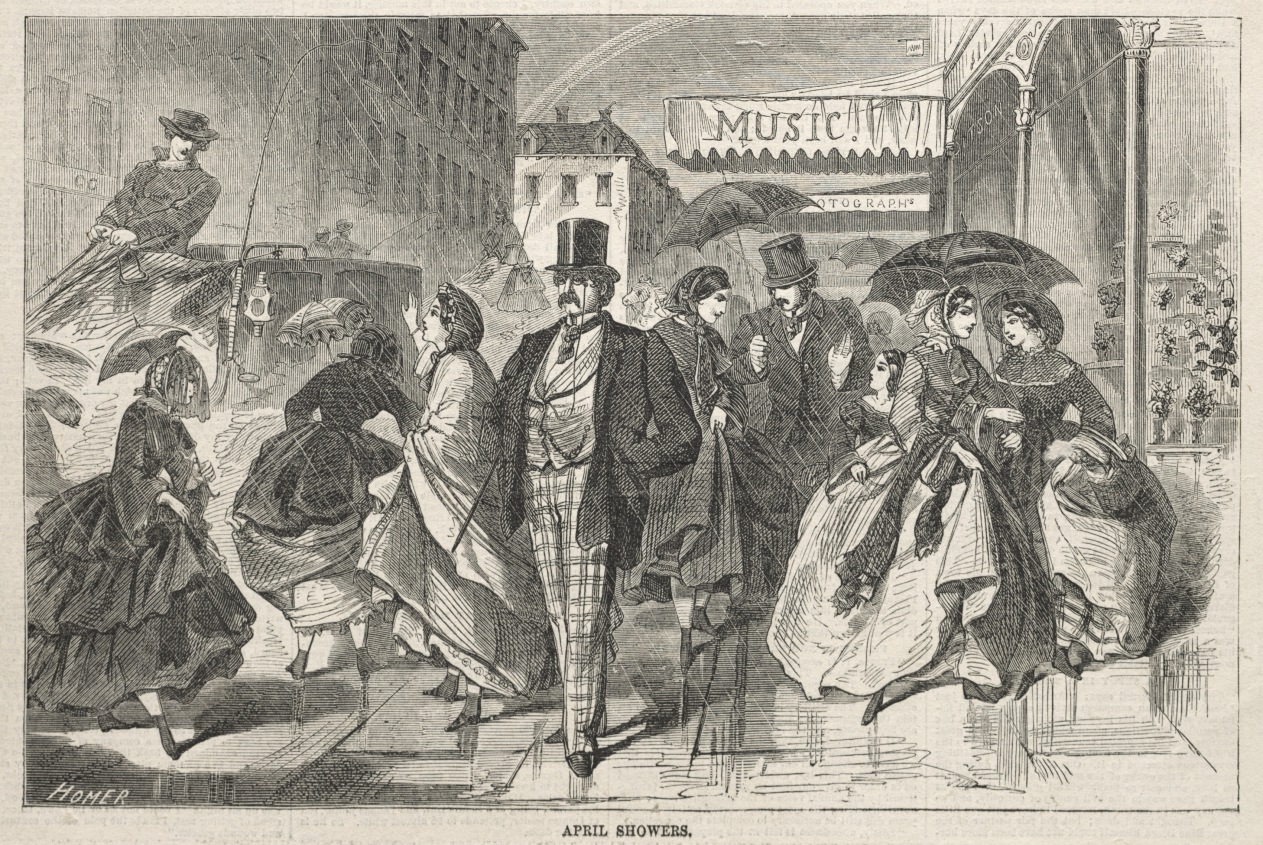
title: April Showers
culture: America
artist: Winslow Homer (American, 1836–1910)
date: 1859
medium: wood engraving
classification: Print